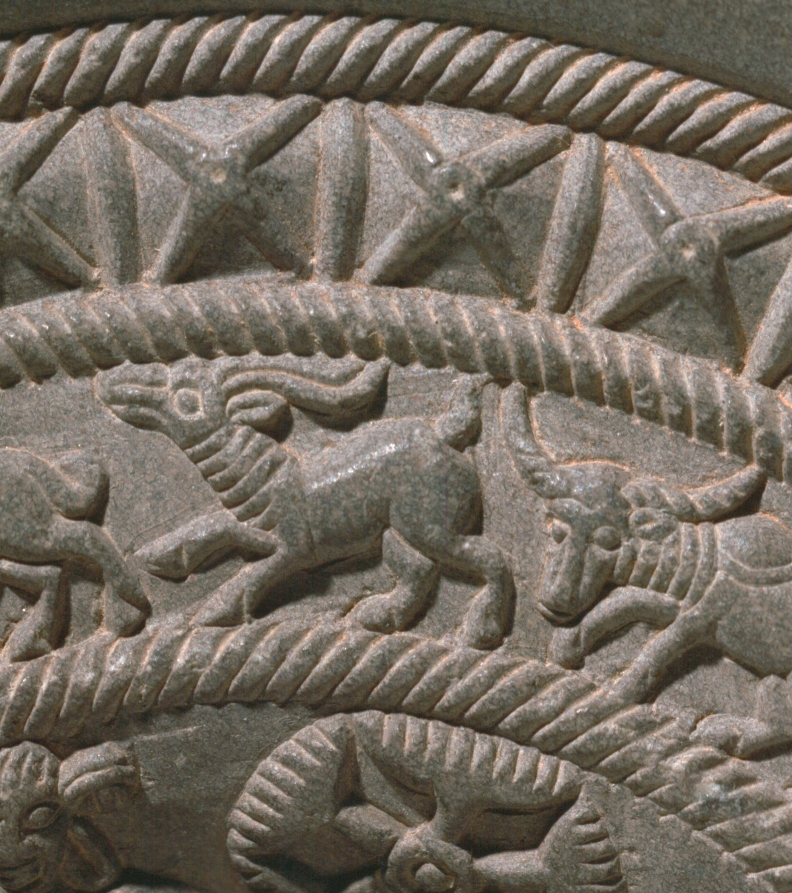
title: Ringstone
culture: India, Maurya period (322–185 BCE)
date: 200s BCE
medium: steatite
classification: Sculpture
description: Ringstones are among the earliest works of art to be created in stone during India's historical period. This example is finely carved with detailed images of affectionate couples and palm trees, running animals, and geometric motifs in concentric circles. The function of ringstones remains uncertain, since none of the surviving examples is inscribed or explained in a text.